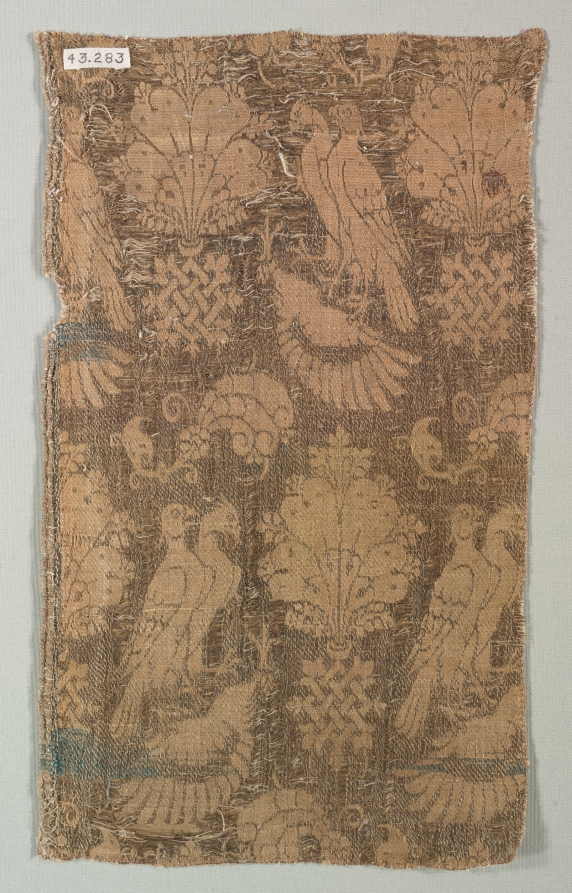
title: Gold-patterned Silk with Falcons and Heraldry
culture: Italy, last third of 14th century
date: 1360–1400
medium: Silk, gold thread; a combination of two weaves (lampas)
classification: Textile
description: Instead of international designs, this splendid gold-thread patterned silk displays a mixture of heraldic and falconry emblems. Pairs of falcons stand on a main d’aigle, a heraldic charge consisting of a bird’s wing and claw. They alternate with a panache, or plumes, from an ostrich with an ornamental interlacement at its base. Traditionally panaches were helmet or hat ornaments, but here is a heraldic crest. Although European motifs form the pattern, the dramatic energy of asymmetrical Chinese design persists.